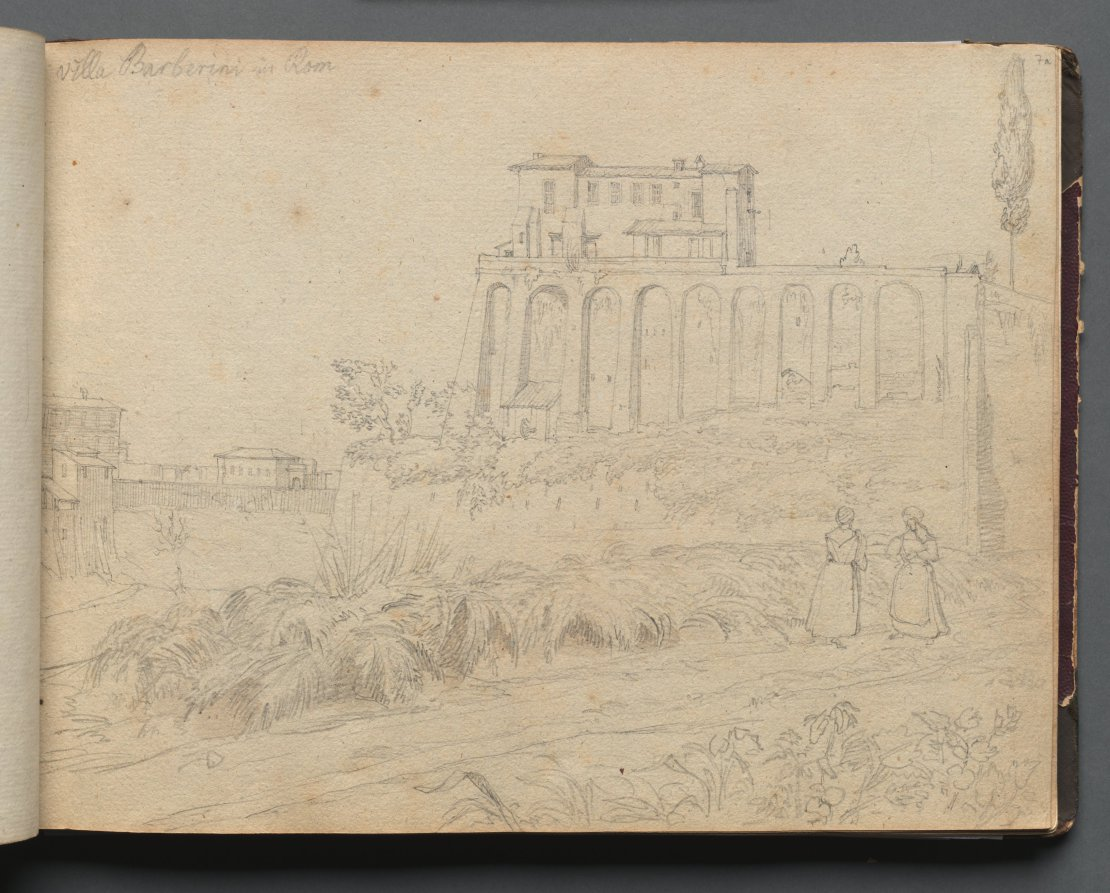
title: Album with Views of Rome and Surroundings, Landscape Studies, page 07a: "Villla Barberini in Rome"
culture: Germany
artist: Franz Johann Heinrich Nadorp (German, 1794–1876)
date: c. 1830s-70s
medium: graphite with brown wash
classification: Bound Volume